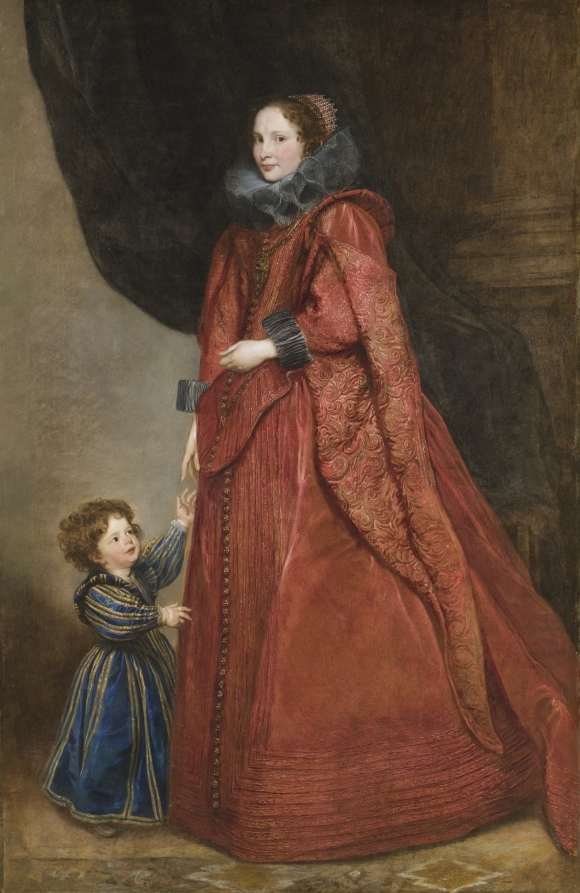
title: A Genoese Lady with Her Child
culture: Flanders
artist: Anthony van Dyck (Flemish, 1599–1641)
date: c. 1623–25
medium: oil on canvas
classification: Painting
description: Prior to the 1600s, large, full-length portraits of wealthy clients usually emphasized the trappings of status above any other qualities. The accuracy of the likeness and vivacity of the person remained subordinate to an easily readable sense of the sitter’s power and position in society. Artists such as Van Dyck transformed this tradition, which sent shockwaves through Genoa, instantly changing the direction of elite portraiture in the city. While the elaborate garb of this unidentified sitter and the scale of the image certainly mark her status, the warmth Van Dyck imparted to her face, the drama of the background, and the touching detail of the child spontaneously reaching upward add life, energy, and theatricality to the work.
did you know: This portrait was a departure from the painting style popular at this time, focusing less on a demonstrative display of wealth and status and more on capturing the essence of the sitter. Although the clothing denotes affluence, this intimate interaction between mother and child transcends class boundaries.